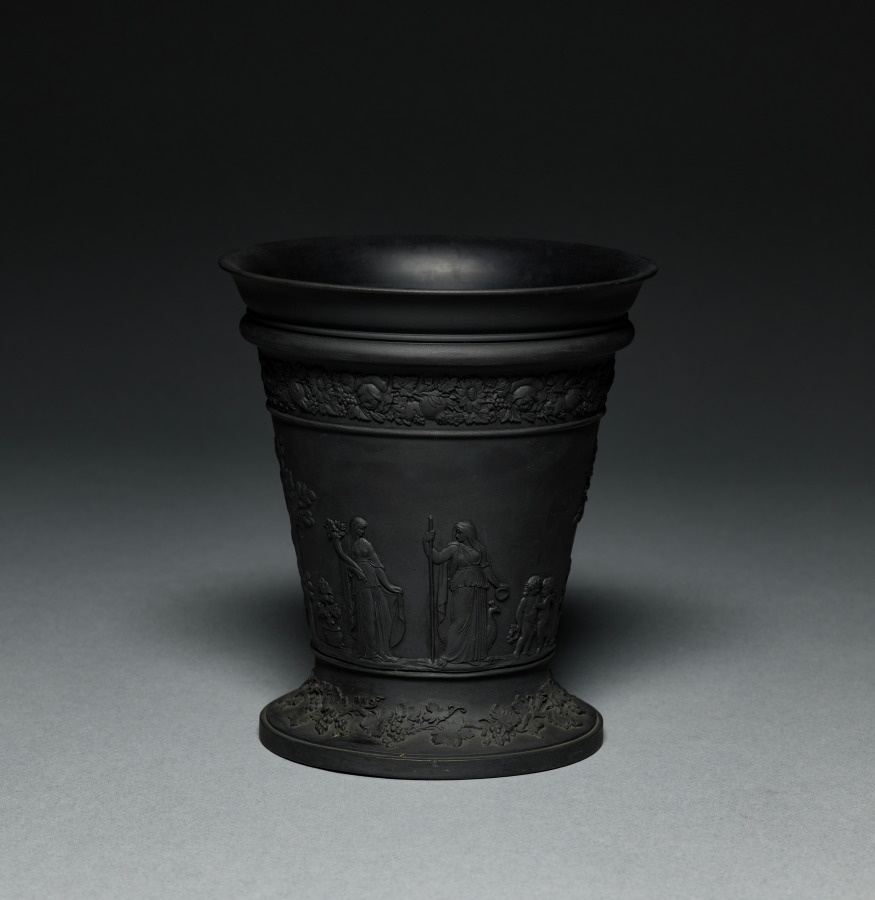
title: Jardiniere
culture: England, Staffordshire, 18th century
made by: Wedgwood Factory (British)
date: late 1700s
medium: black basalt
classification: Ceramic